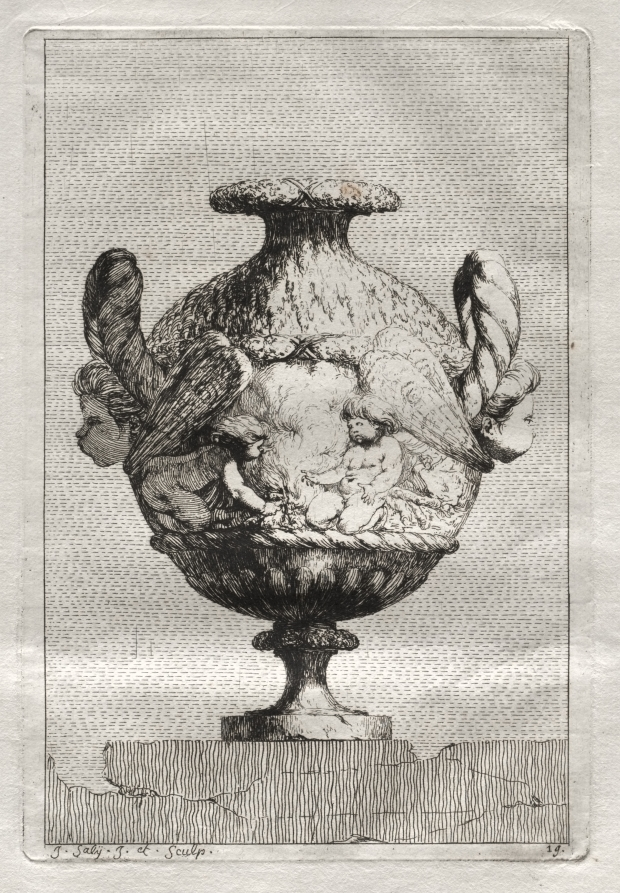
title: Suite of Vases: Plate 19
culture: France, 18th century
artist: Jacques François Saly (French, 1717–1776)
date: 1746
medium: etching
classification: Print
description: Designing ornamental vases or urns was particularly popular during the mid-18th century since the only limit to the possibilities was the imagination of the artist. Saly, a sculptor by training, was a student at the French Academy in Rome from 1740 to 1746, at which time he published a set of 30 etchings. Saly began with basic antique vase forms but deviated from classical ornament to use a rich variety of fantastic creatures for embellishment.